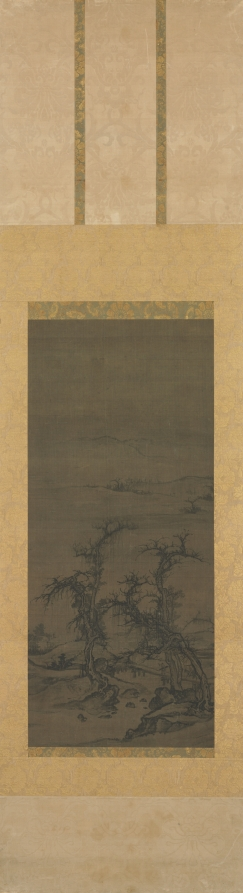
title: Carrying a Qin on a Visit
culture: China, Yuan dynasty (1271-1368)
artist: attributed to Luo Zhichuan (Chinese, active 1280s–1320s)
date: 1271–1368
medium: hanging scroll (now paneled), ink on silk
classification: Painting